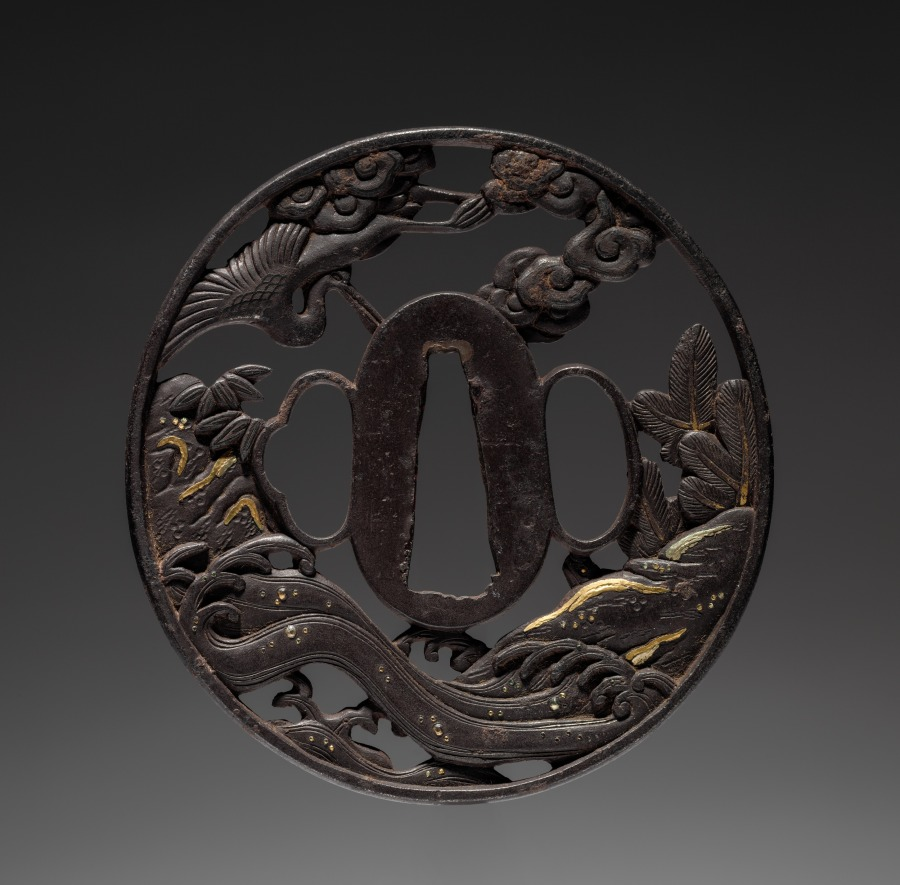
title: Sword Guard (Tsuba) with Crane and Tortoise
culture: Japan, possibly Edo period (1615-1868)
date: c. 1615–1868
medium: iron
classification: Arms and Armor